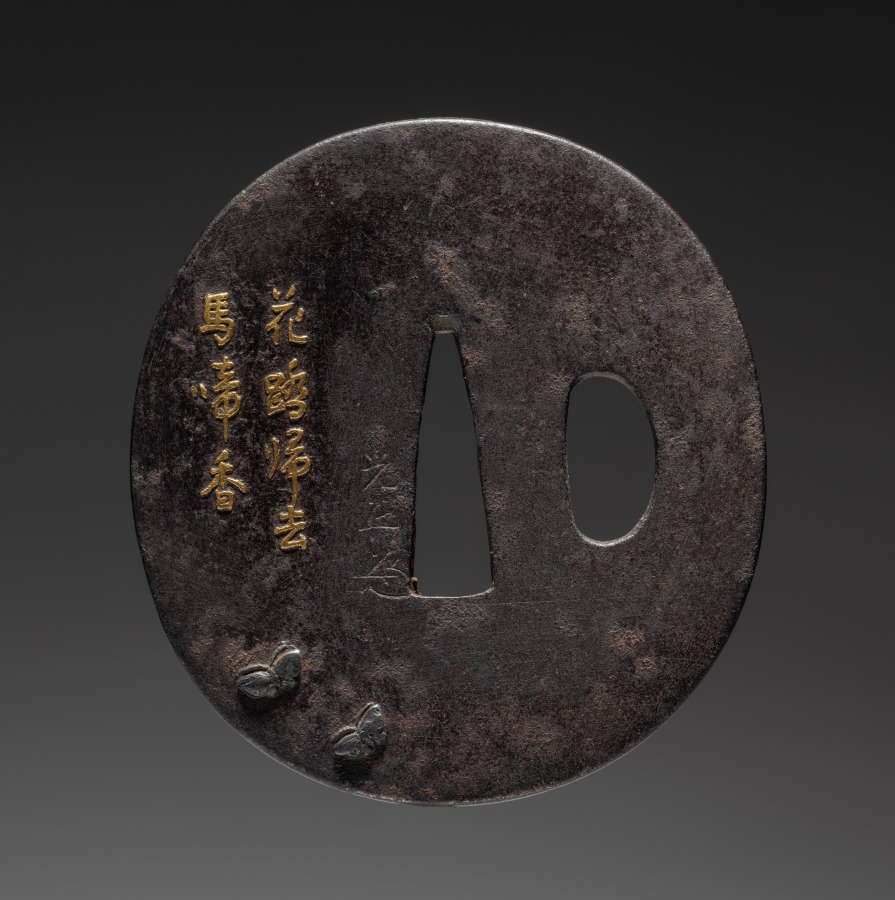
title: Sword Guard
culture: Japan, Edo period (1615–1868)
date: 1766–1834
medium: metal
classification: Arms and Armor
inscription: Signature: Mitsuoki